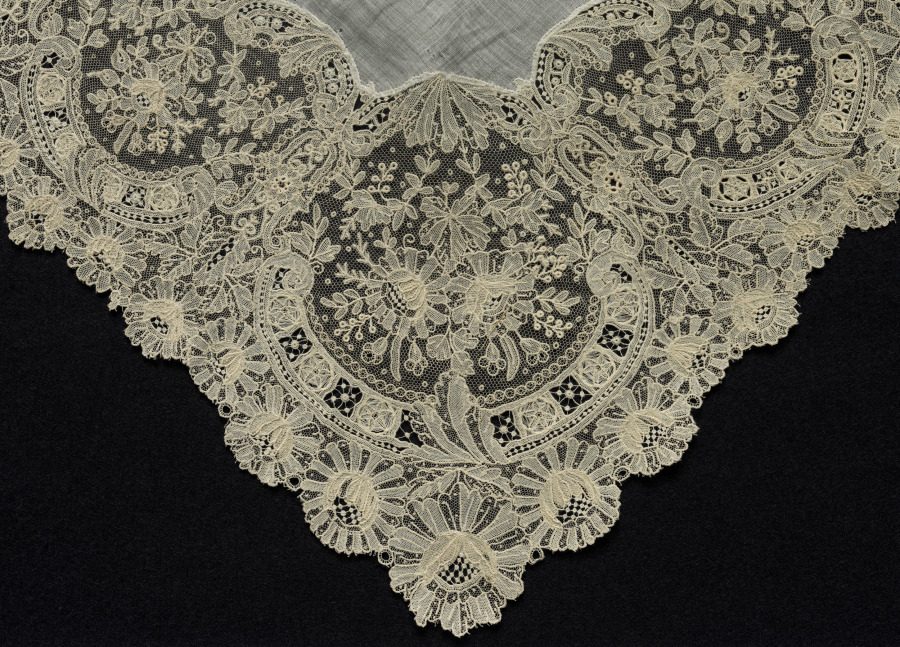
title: Lace Handkerchief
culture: Belgium (Flanders)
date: 1800s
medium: Needle lace (point de gaze)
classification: Lace